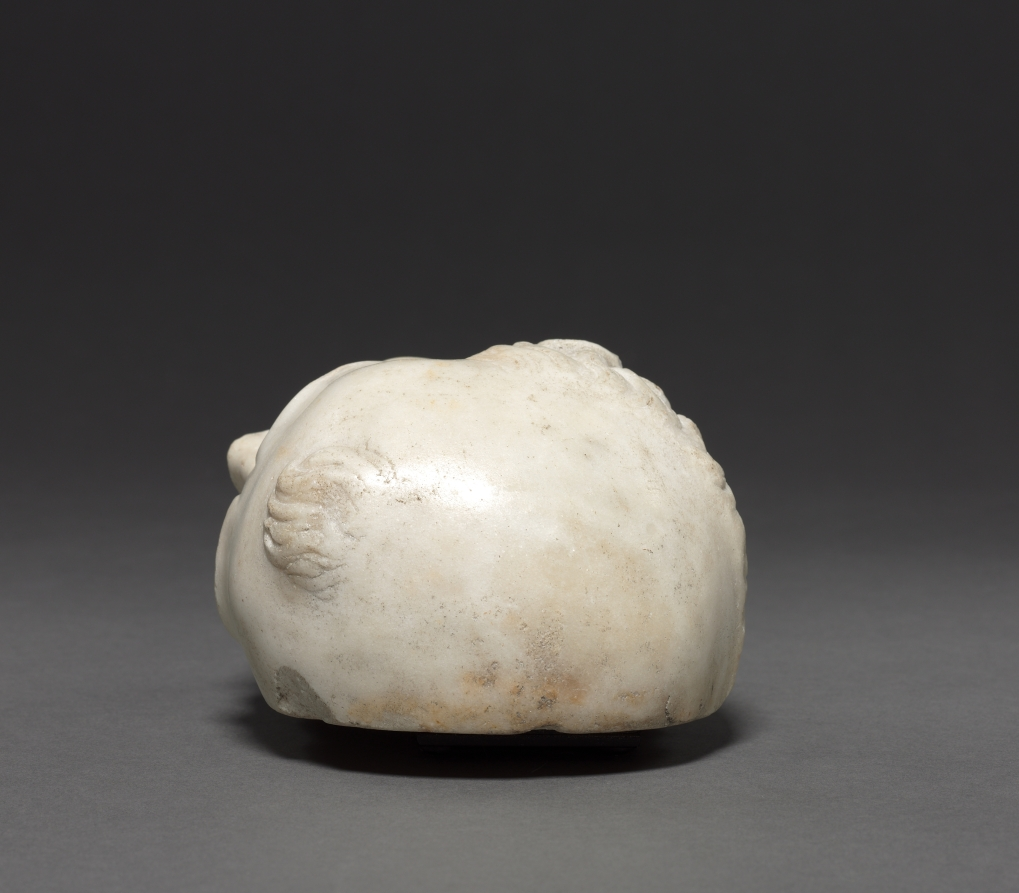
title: Head of a Man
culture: France, 15th century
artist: circle of Michel Colombe (French, c. 1430–c. 1513)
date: 1520–1525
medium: marble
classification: Sculpture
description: The original context and function of these two marble heads are unknown. They are presumed to have been part of a relief sculpture from a château, perhaps in the Loire region, or else from a tomb sculpture. Their style is reminiscent of sculptures produced by Michel Colombe, a prominent sculptor active in the Loire Valley in the service of aristocratic and royal patrons, and may have been carved by a close follower or member of his workshop.